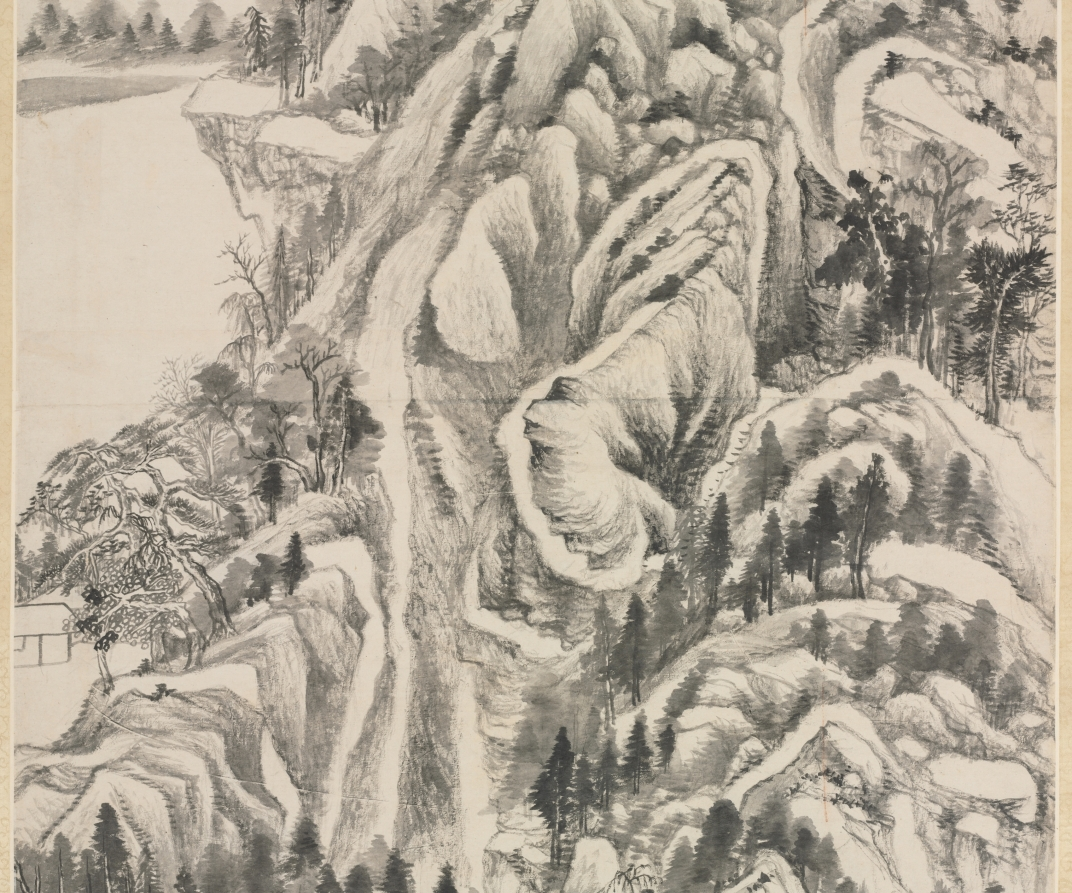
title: Mt. Qingbian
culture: China, Ming dynasty (1368–1644)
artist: Dong Qichang (Chinese, 1555–1636)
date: 1617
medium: hanging scroll, ink on paper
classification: Painting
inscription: Artist's first inscription, signature, and 2 seals: A painting of the Qingbian Mountains in the manner of Beiyuan [Dong Yuan]. In the summer of the dingsi year [1617], on the last day of the fifth month, [I] send this to my senior, Zhang Shenqi. Dong Xuanzai [seals] Zhi zhi hao ri jiang guan 知制誥日講官; Dong Qichang yin 董其昌印.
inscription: Artist's second inscription and signature: Piling irons for ten thousand feet guard the purple sky;/ Where puppies are seen on top of clouds, villages and marketplaces lie./ In the splendor of autumn, where is the most worthy spot to spend the day?/ Amid the rustling sounds of mountain streams, with a volume in hand, meditating on the Way [Dao]. Inscribed by Qichang. (trans. WKH/LYSL)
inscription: 4 additional seals: 3 of Li Enqing 李恩慶 (jinshi of 1833); 1 of Weng Wan-go 翁萬戈 (b. 1918).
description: Dong Qichang radically transforms the landscape composition into a purely abstract design. He organizes the mountain forms to achieve an overall sense of structure, activating the flow of energy (qi) and the momentum of force (shi) throughout the pictorial design. In his art, brush and ink assume life independent of the depicted forms, so that the painting can be appreciated for “the sheer marvels of brush and ink.”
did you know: Dong Qichang had visited the Bian Mountains, which are part of a low range located not far from Wuxing and Lake Tai in the southern province of Zhejiang.